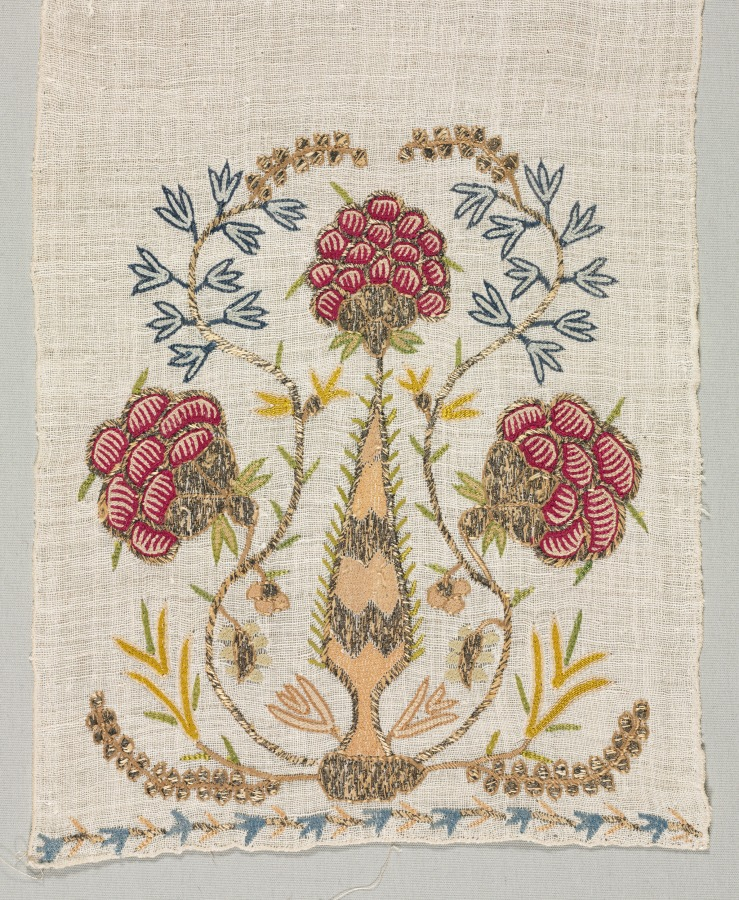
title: Embroidered Sash (Uckur)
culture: Turkey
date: 1700s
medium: embroidery: silk and silver filé on linen tabby ground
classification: Embroidery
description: Each end of the sash is embroidered with a single motif of large-scale flowering plants. Below the main motif is a stylized foliate device forming a narrow border.